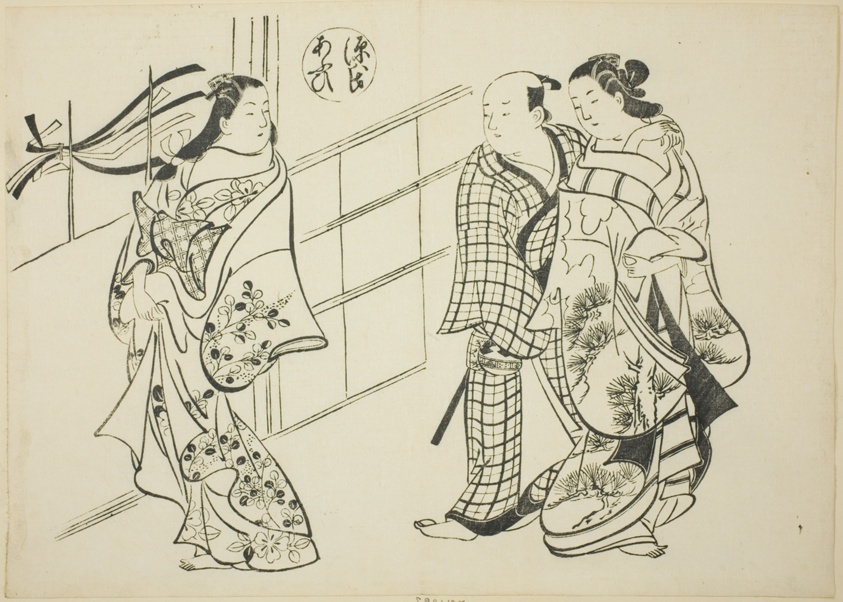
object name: Print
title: The Aoi Chapter from "The Tale of Genji" (Genji Aoi), from a series of Genji parodies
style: Japanese (culture or style)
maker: Okumura Masanobu (Japanese, 1686-1764)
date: c. 1710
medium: Woodblock print; oban, sumizuri-e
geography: Japan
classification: woodblock print; print; asian art; woodblock